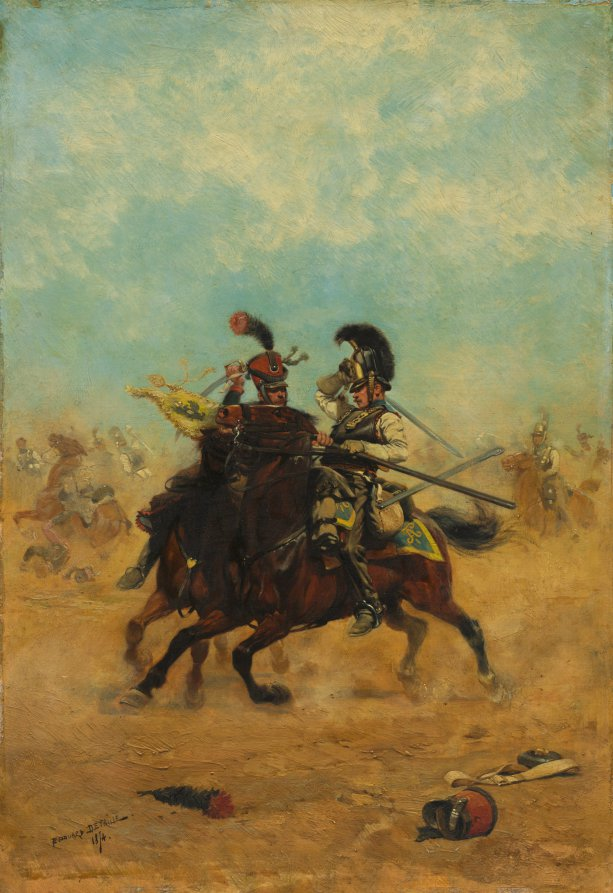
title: Combat for the Colors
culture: France, 19th century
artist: Édouard Detaille (French, 1848–1912)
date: 1874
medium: oil on wood panel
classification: Painting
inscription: Signed in black paint lower left corner: edouard detaille / 1874